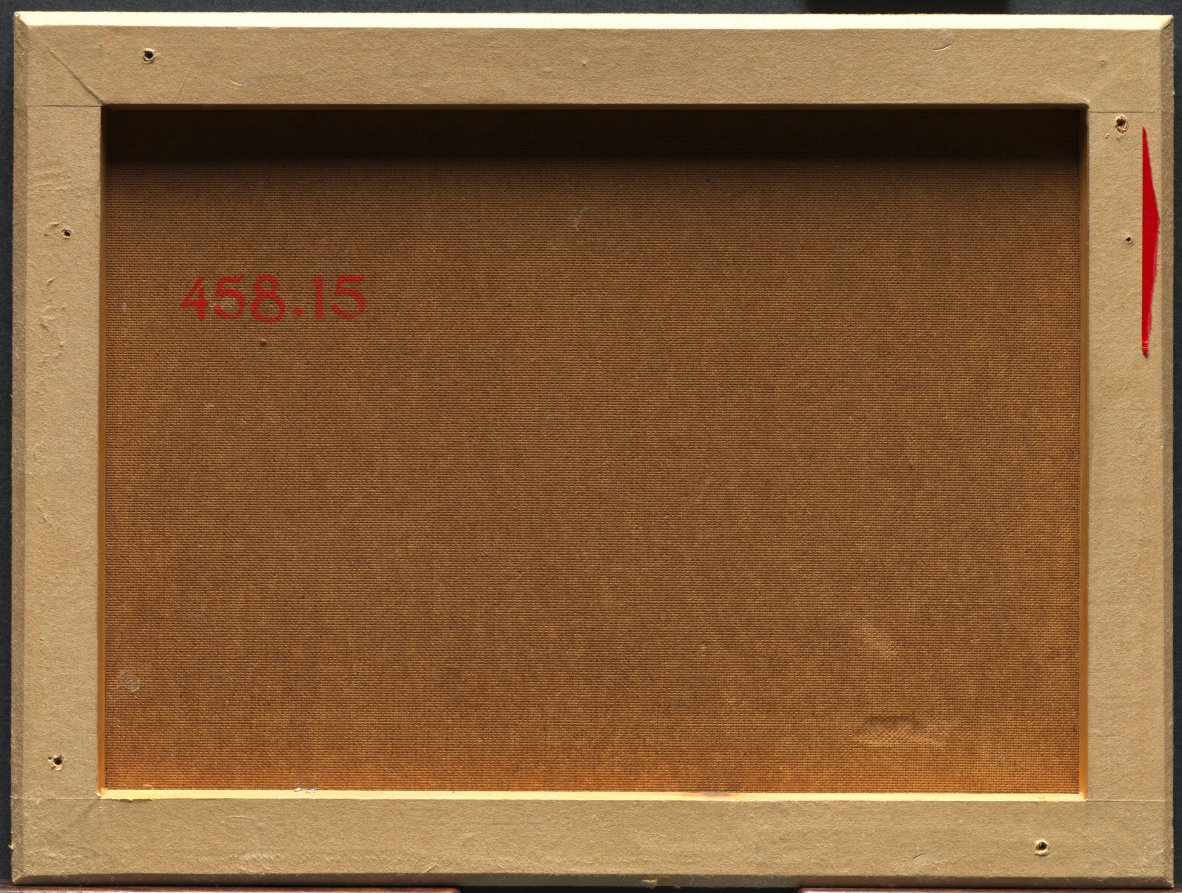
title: Still Life with Fruit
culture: Germany, 19th century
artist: Emilie Preyer (German, 1849–1930)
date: 1873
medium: oil on fabric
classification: Painting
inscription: Signed lower right corner: Emilie Preijer 1873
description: This composition contains many elements that show Preyer's technical abilities. She convincingly rendered the various textures juxtaposed in this composition, such as the contrast between the white cloth and the polished marble table, and the reflecting surfaces of metal, water drops, and glass versus the delicate skin of peaches and grapes. The knife that appears to project out over the side of the table is an indicator of Preyer's familiarity with the tradition of Dutch still-life painting. After early training with her father, Johann Wilhelm Preyer (1803-1889), Emilie Preyer painted her first still life in 1867. For study purposes, she visited museums in Dresden, Antwerp, and the Netherlands. She focused primarily on still lifes of fruit.